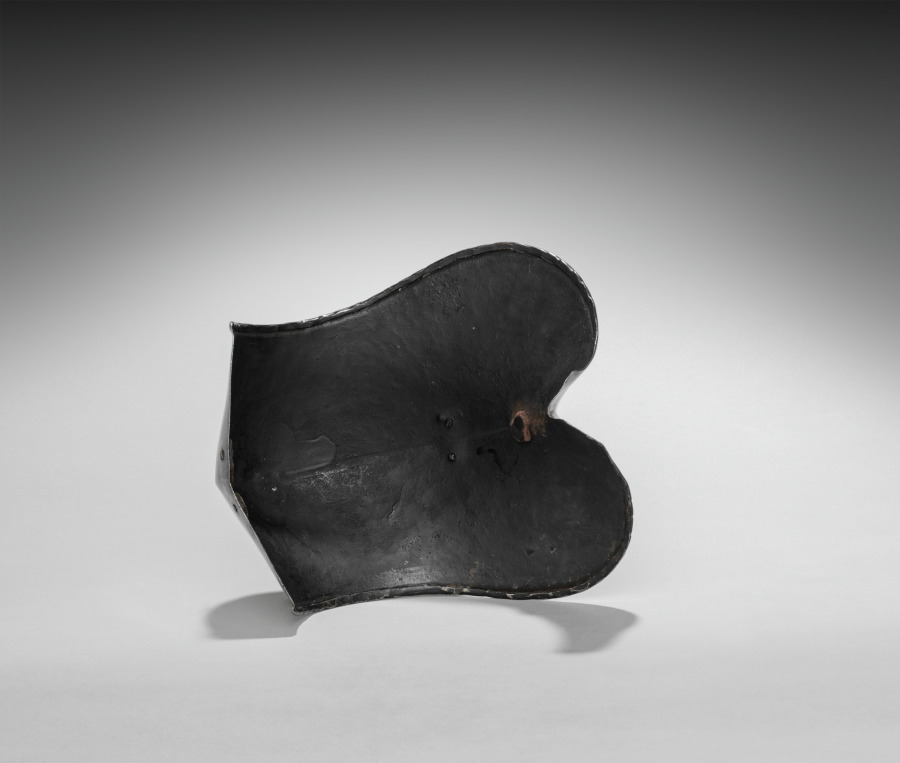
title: Elbow Cop (left)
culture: Germany and Spain, 16th century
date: c. 1560–1580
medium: steel, leather straps, brass rivets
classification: Arms and Armor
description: This armor was developed for the joust-a sporting combat between two mounted contestants. Although all of the elements of this armor date from the same period, they are not all from the same suit. This armor is thus called "composed." It also shows the asymmetry of jousting armor. The participants rode along a wall-like barrier known as a "tilt" with their left sides facing one another. Consequently, armor on that side of the body had to be thicker. Note the large plate (grandguard) over the left shoulder for extra protection. Also, the breathing holes in the helmet were placed on the right side (farthest from an opponent's lance) to avoid injuries from splinters. The bracket attached to the right breastplate is called the lance-rest, a shock-absorbing support designed to accommodate the lance when "couched" under the right armpit.